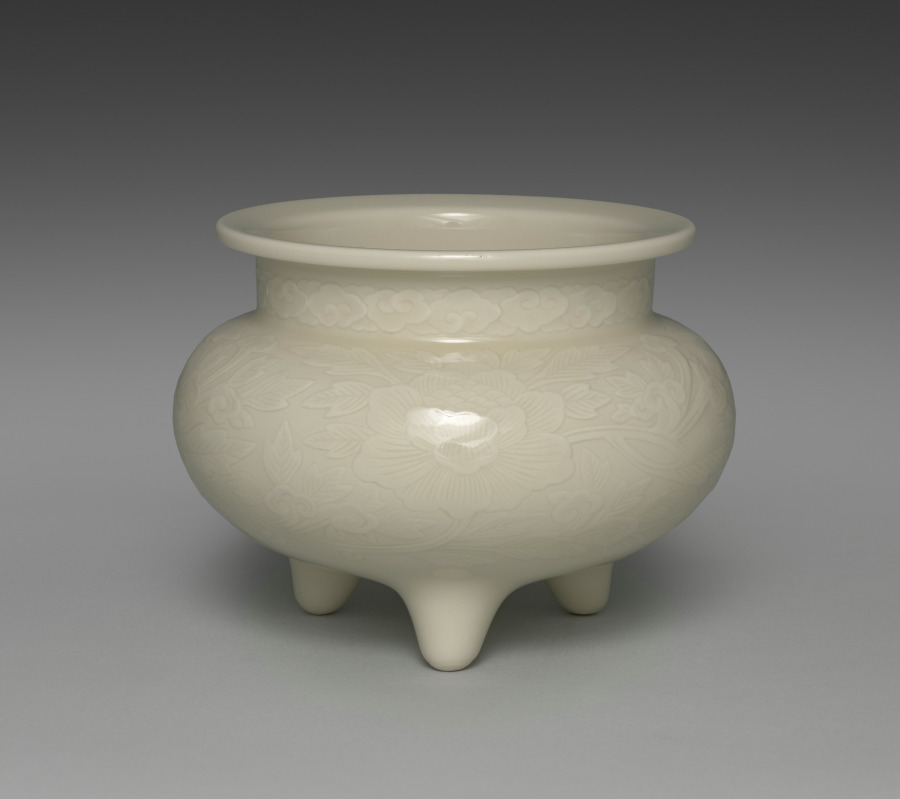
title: Incense Burner with Peony and Cloud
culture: Japan, Meiji period (1868–1912)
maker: Seifū Yohei III (Japanese, 1851–1914)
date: 1914–46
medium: Porcelain with molded and incised design, pale pink glaze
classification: Ceramic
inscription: 清風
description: Yohei IV’s incense burner has a scrolling floral pattern of peonies and nyoi staff-head forms around the body and a band of clouds around the collar. These are done in low relief, with incised lines marking the details in the flower petals and leaves. The silver lid has a proliferation of flowers, including lily, peony, and a variety of chrysanthemums. The box lid identifies the subtle pink over an ivory body as “dawn’s light[–glazed] porcelain” (shokōji). After he became an Artist of the Imperial Household, Yohei III created a number of glaze and clay combinations with what would have been considered Japan-focused names to be in alignment with his position as an artist representing the nation. Among them was a glaze called “dawn’s light pale [pink] color” (akebonoiro tansai), which he invented in 1895. It is possible that this incense burner is an example with this glaze, despite the slightly different name given on the box. While the name alludes to the Land of the Rising Sun, an epithet for Japan, the burner’s motifs remain very much drawn from the Chinese repertoire.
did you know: Seifū Yohei IV’s incense burner has a pale pink glaze named “dawn’s light.”